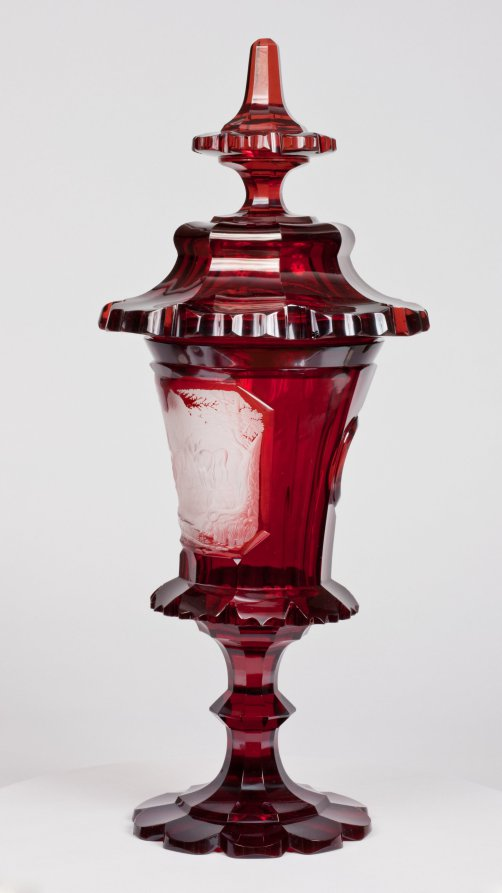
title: Covered Cup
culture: Bohemia, 19th century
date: mid-1800s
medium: ruby glass with engraved decoration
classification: Glass